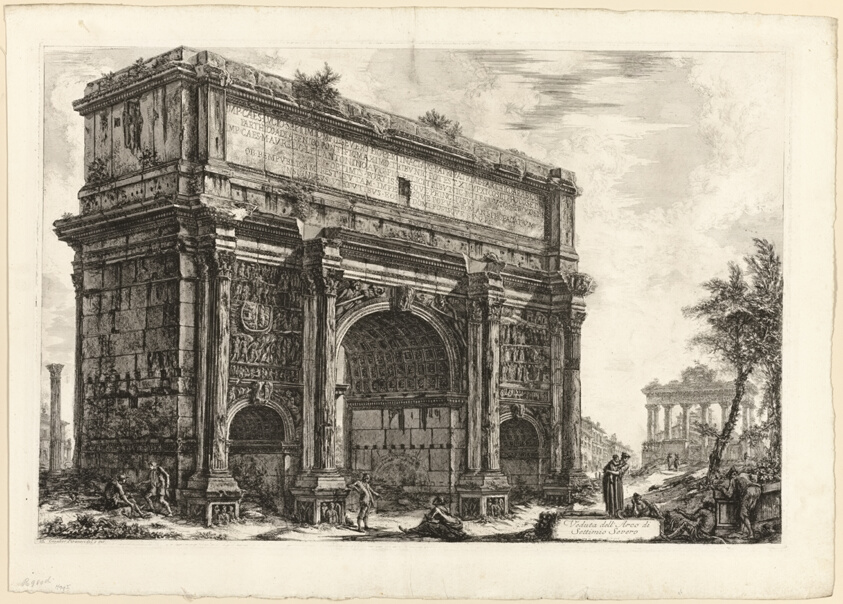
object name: Print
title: View of the Arch of Septimius Severus, from Views of Rome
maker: Giovanni Battista Piranesi (Italian, 1720-1778); published by Francesco (Italian, 1758-1810) and Pietro Piranesi (Italian, born 1758/9)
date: 1772, published 1800–07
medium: Etching on heavy ivory laid paper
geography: Italy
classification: etching; print; prints and drawing